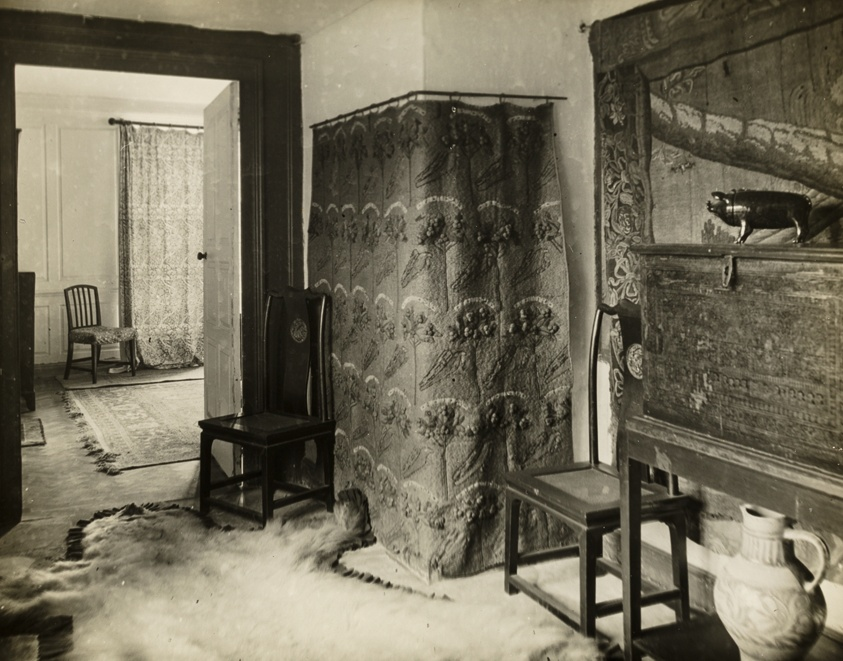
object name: Photograph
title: Kelmscott Manor: Passage to Parallel Room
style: Pictorialism, 19th century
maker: Frederick H. Evans (English, 1853–1943)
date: 1896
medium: Lantern slide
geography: England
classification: photograph; photography